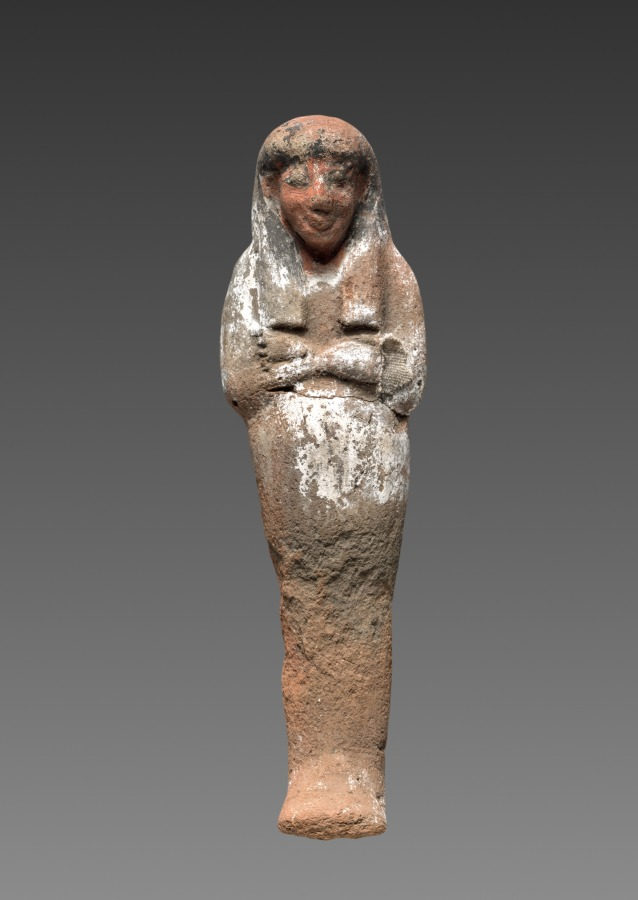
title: Shawabty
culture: Egypt, New Kingdom (1540–1069 BCE), Dynasties 19–20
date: 1295–1069 BCE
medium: terracotta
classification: Funerary Equipment